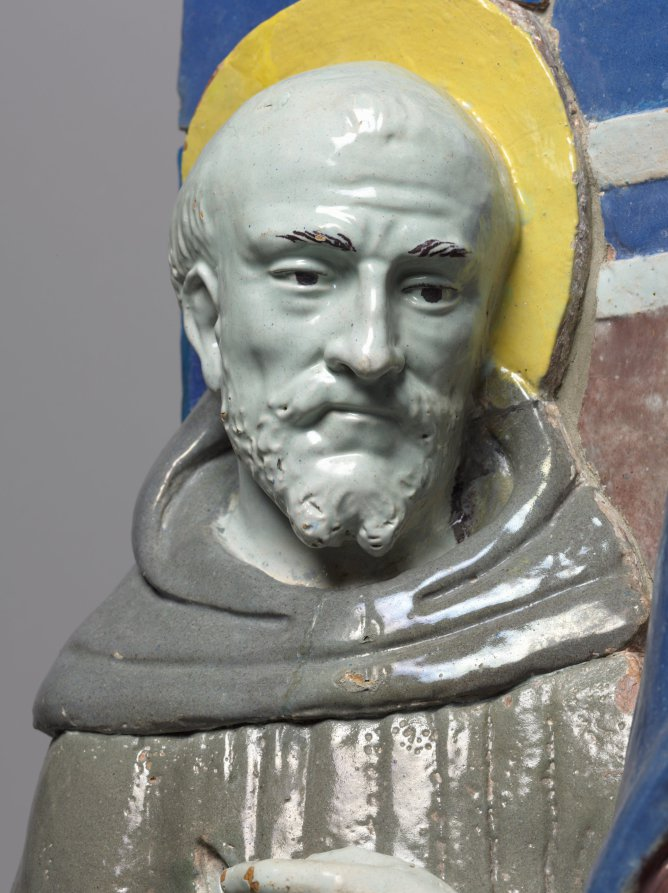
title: Virgin and Child Enthroned with Saints Francis and Giovanni Gualberto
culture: Italy, Florence, 16th century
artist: Benedetto Buglioni (Italian, 1461–1521)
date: c. 1510–20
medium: glazed terracotta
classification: Sculpture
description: The Madonna sits upon a throne with the Christ child standing on her knee. He is steadied by his mother, turning delicately to grasp her robe for support. On the left is Saint Francis, identified by his stigmata. On the right, Saint Giovanni Gualberto is identified by his monk's robe and distinctive processional cross. The brown robes of the saints, the purple of the Virgin's tunic, and the flesh tones of the figures contrast strongly against the bright blue background. In the semicircular sky behind the figures, three winged cherub heads emerge, representing a host of angels. Glazed terracotta is both durable and decorative and the gleaming white of this piece would have stood out in the darkness of a church. The medium was made popular by Renaissance artist Luca della Robbia and came into fashion as a substitute for expensive carved marble. A rounded arch frame embellished with fruit and flower garlands as well as egg-and-dart and cord moldings accompanied the work when it was acquired, but was later determined not to be original and removed. Buglioni's work bears the influence of the della Robbias, particularly in the simple color scheme. Buglioni likely worked in the studio of Luca's nephew, Andrea, where he would have learned the technique of glazing terracotta.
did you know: The unusual purple hue is particular to the artist.